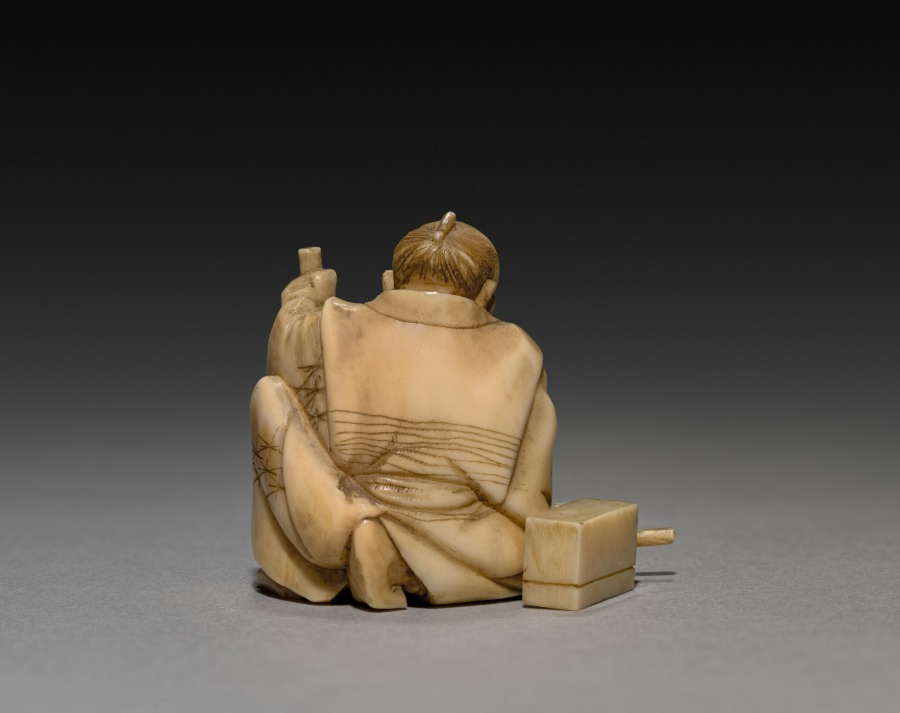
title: Parasol Vendor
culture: Japan, Meiji period (1868–1912)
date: late 1800s-early 1900s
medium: ivory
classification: Ivory